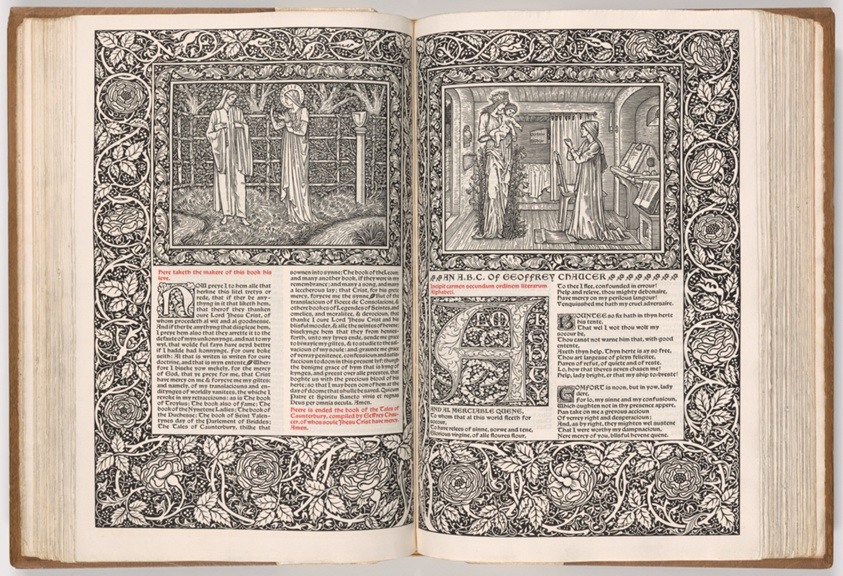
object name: Book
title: The Works of Geoffrey Chaucer Now Newly Imprinted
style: Arts and Crafts Movement, 19th century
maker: William Morris (English, 1834–1896); Illustrated by Sir Edward Burne-Jones (English, 1833-1898); Engraved by William Harcourt Hooper (English, 1834-1912)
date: 1896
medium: Hand-printed book on Batchelor linen paper, bound with tooled white pigskin on oak board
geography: England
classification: book; ink on paper